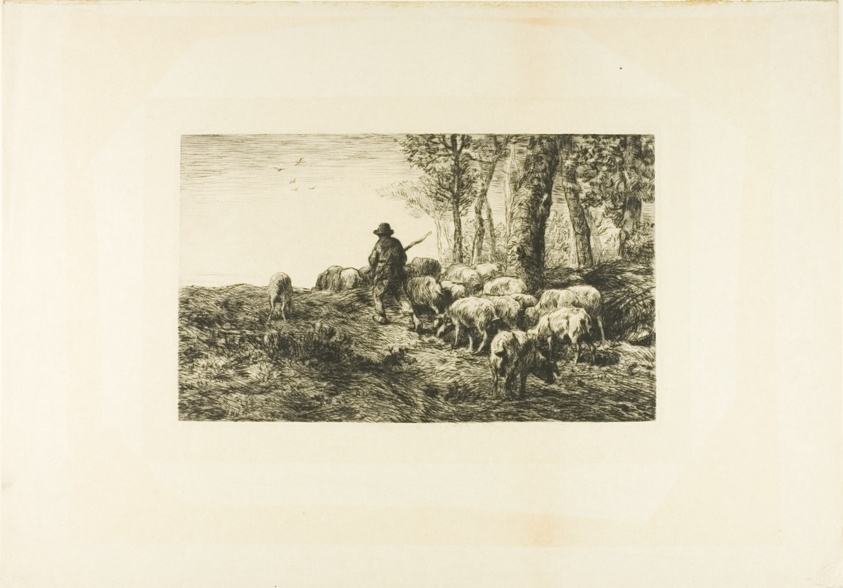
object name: Print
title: Herd of Pigs with Swineherd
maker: Charles Émile Jacque (French, 1813-1894)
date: 1878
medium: Drypoint on cream simili-Japanese paper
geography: France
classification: drypoint; print; prints and drawing